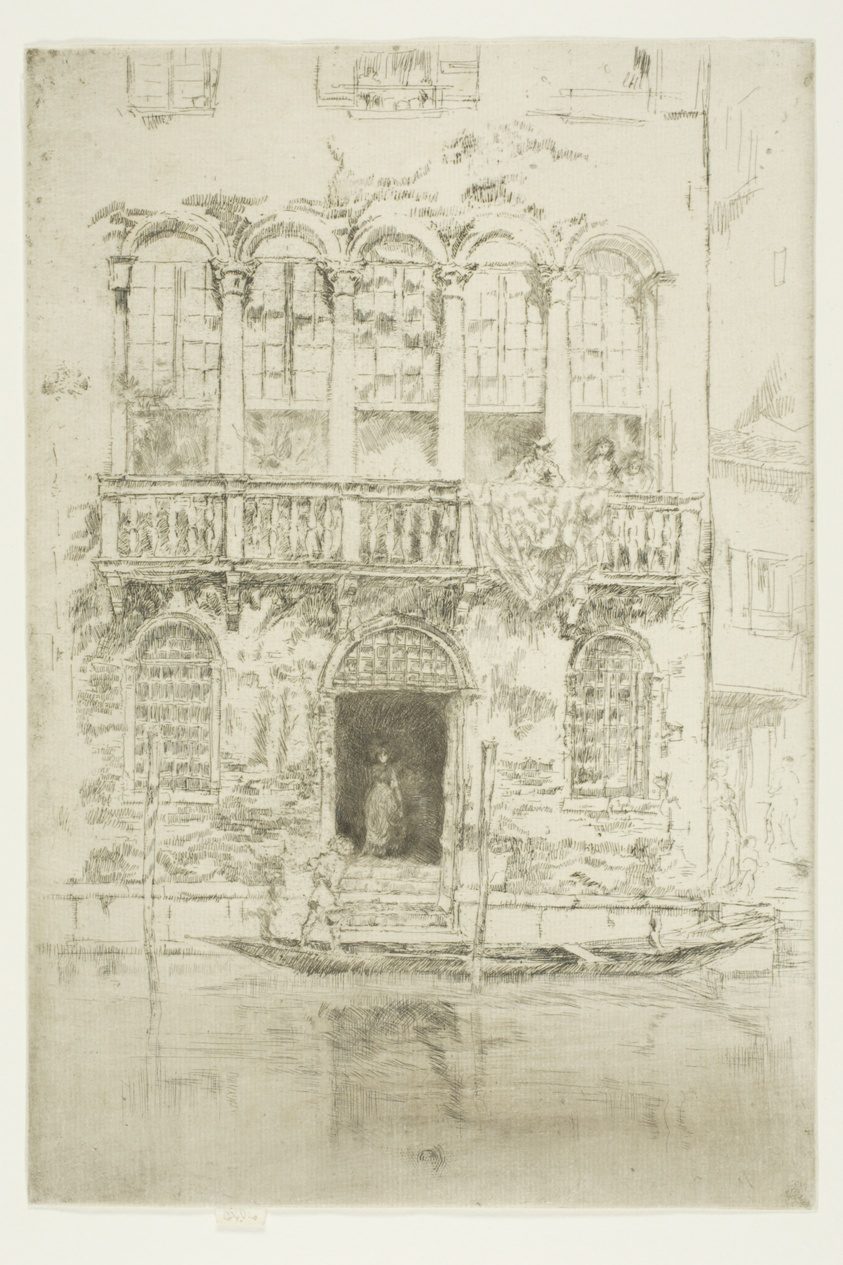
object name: Print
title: The Balcony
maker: James McNeill Whistler (American, 1834-1903)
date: 1879/80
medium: Etching and drypoint with foul biting in dark brown ink on ivory laid paper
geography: United States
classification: etching; foul biting; print; prints and drawing; drypoint; paper